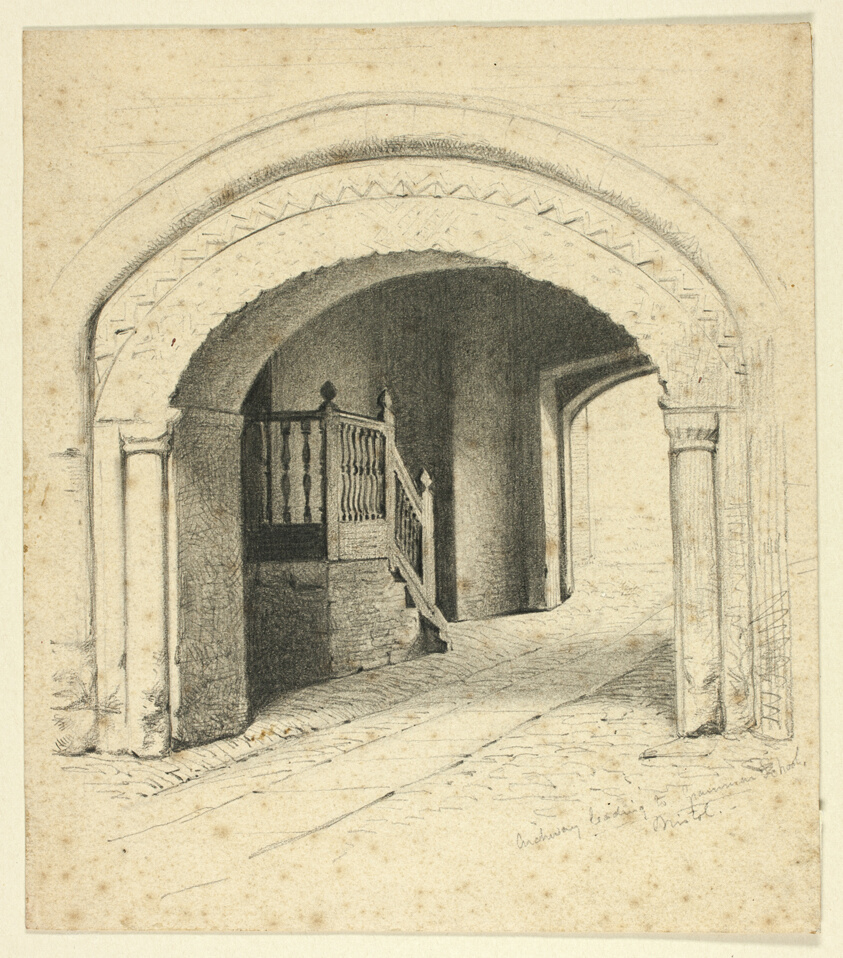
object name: Drawing and Watercolor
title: Archway Leading to Grammar School, Bristol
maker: Attributed to Henry Stacy Marks; English, 1829-1898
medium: Graphite and black pencil on tan wove paper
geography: England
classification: graphite; drawings (visual works); prints and drawing